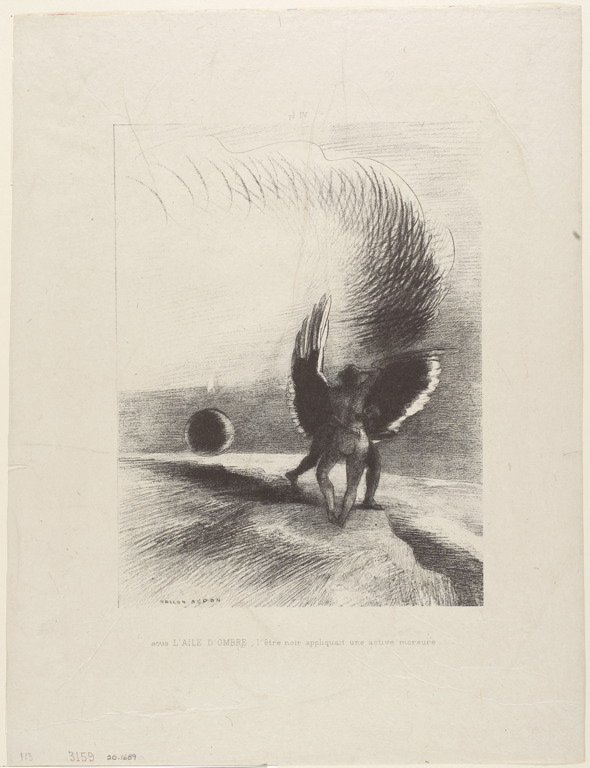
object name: Print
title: Beneath the Wing of a Shadow the Black Creature was Biting Energetically, plate 4 of 6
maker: Odilon Redon (French, 1840-1916)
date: 1891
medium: Lithograph in black on light gray chine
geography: France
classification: lithograph; print; prints and drawing; paper